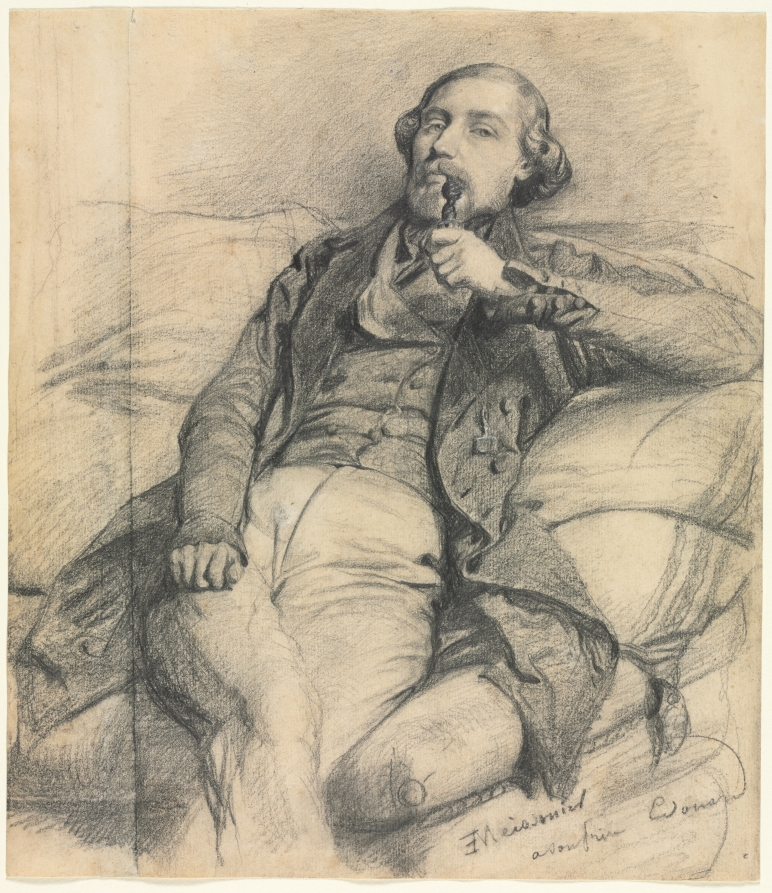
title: Man Smoking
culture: France, 19th century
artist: Ernest Meissonier (French, 1815–1891)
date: 1800s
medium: black chalk and graphite, with stumping, heightened with white gouache?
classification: Drawing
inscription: signed, lower right, in black chalk: EM[in ligature]eissonier / [a son frère?] Edouard ; SECONDARY SUPPORT (now removed and lost) (according to note on departmental catalog sheet): lower left, in graphite: 6 [circled] (visible in photgraph) ; VERSO, upper left, in graphite: 210 (visible in photgraph)